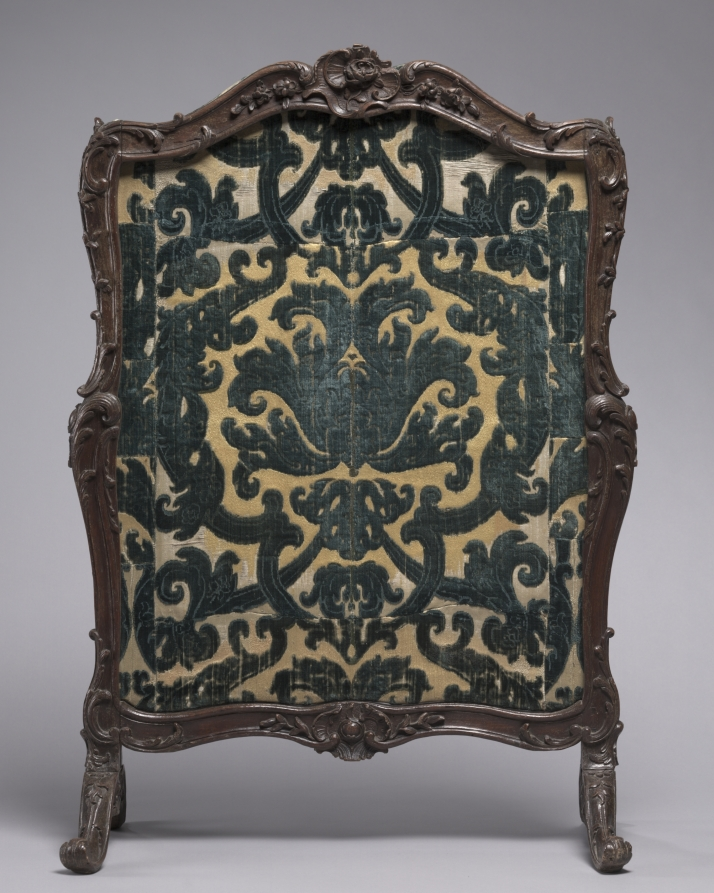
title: Fire Screen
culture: France, 18th century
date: c. 1750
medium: wood and velvet panel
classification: Furniture and woodwork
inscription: inscribed beneath in three places: 32.